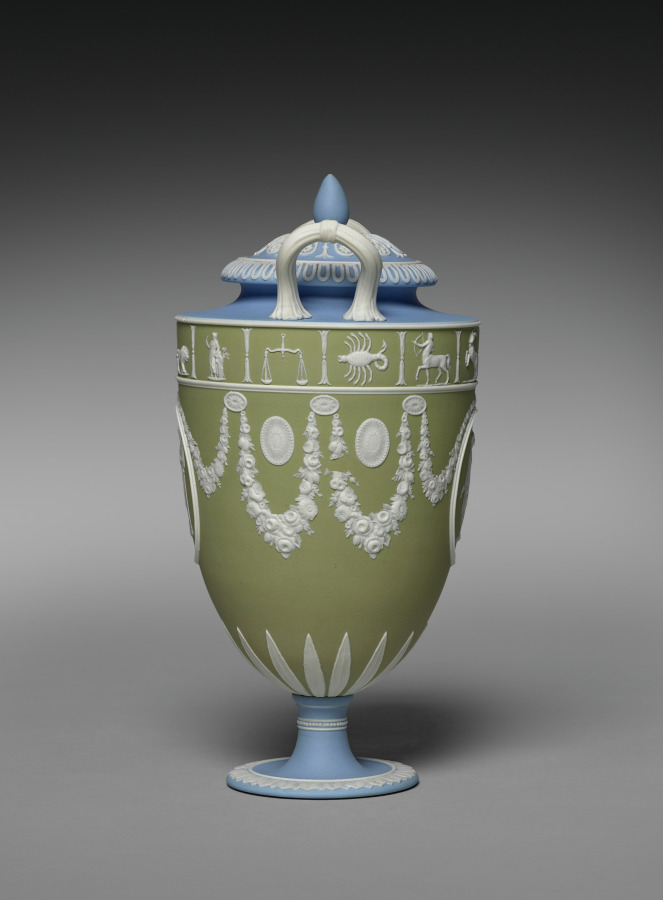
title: Covered Vase (one of a pair)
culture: England, Staffordshire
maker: Josiah Wedgwood and Sons (British, Staffordshire, est. 1759)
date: c. 1850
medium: jasper ware with relief decoration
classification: Ceramic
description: Wedgwood's tricolor jasperware first became popular in the 1770s during a period of fascination with neoclassical decoration. This vase was probably made around 1850 during the period when this type of decoration was revived. The relief medallions depict two versions of the Greek god Apollo, the god of music, next to his harp or lyre.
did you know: Signs of the zodiac form a decorative border around the upper portion of this vase.